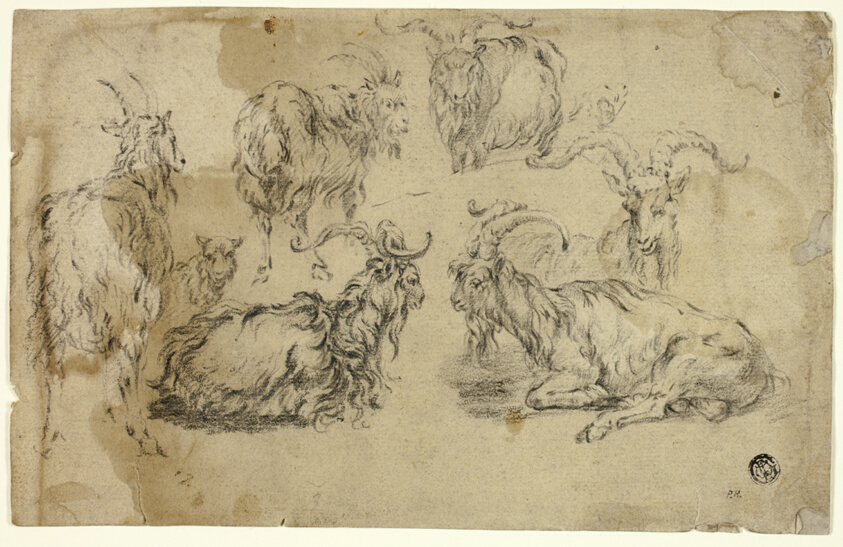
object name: Drawing and Watercolor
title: Sketches of Goats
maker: Johann Gottlieb Hackert (German, 1744-1773)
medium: Charcoal on buff laid paper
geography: Germany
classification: charcoal; drawings (visual works); prints and drawing